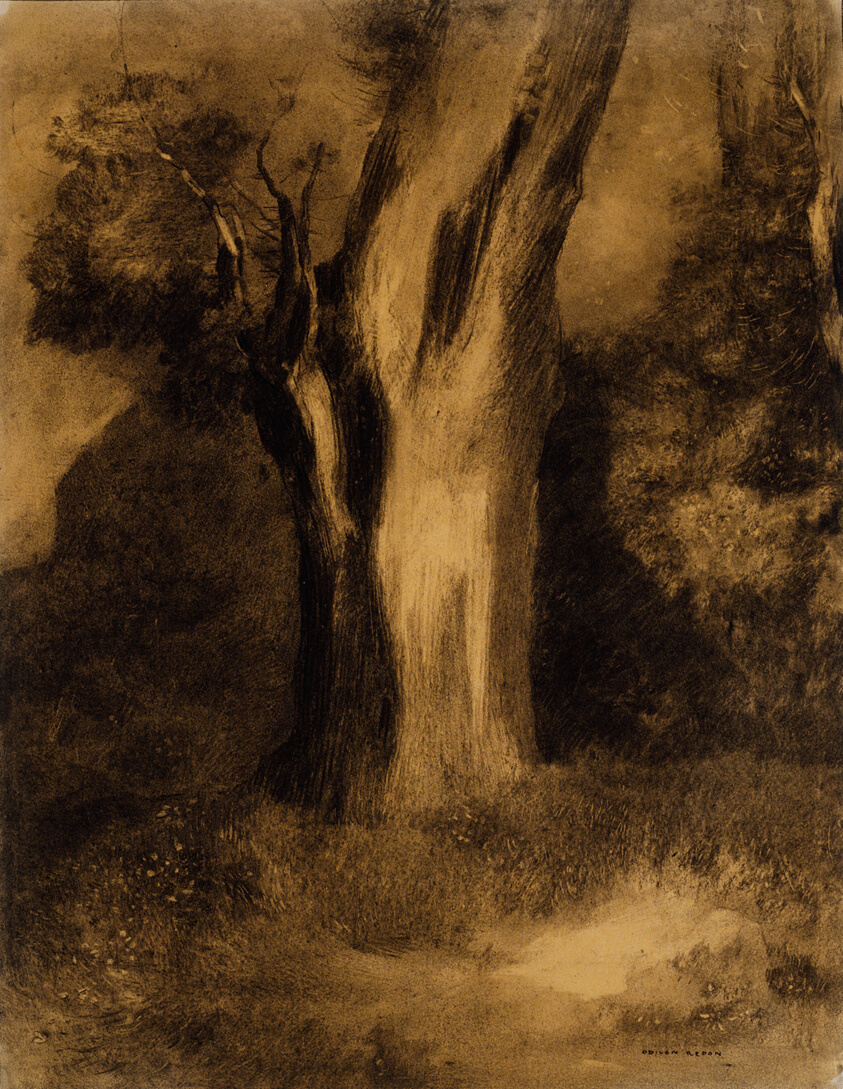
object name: Drawing and Watercolor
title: Tree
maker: Odilon Redon (French, 1840-1916)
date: c. 1875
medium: Black charcoal with touches of brown charcoal, stumping, scraping and erasing, on ivory wove paper, discolored to cream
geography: France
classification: charcoal; drawings (visual works); prints and drawing; paper